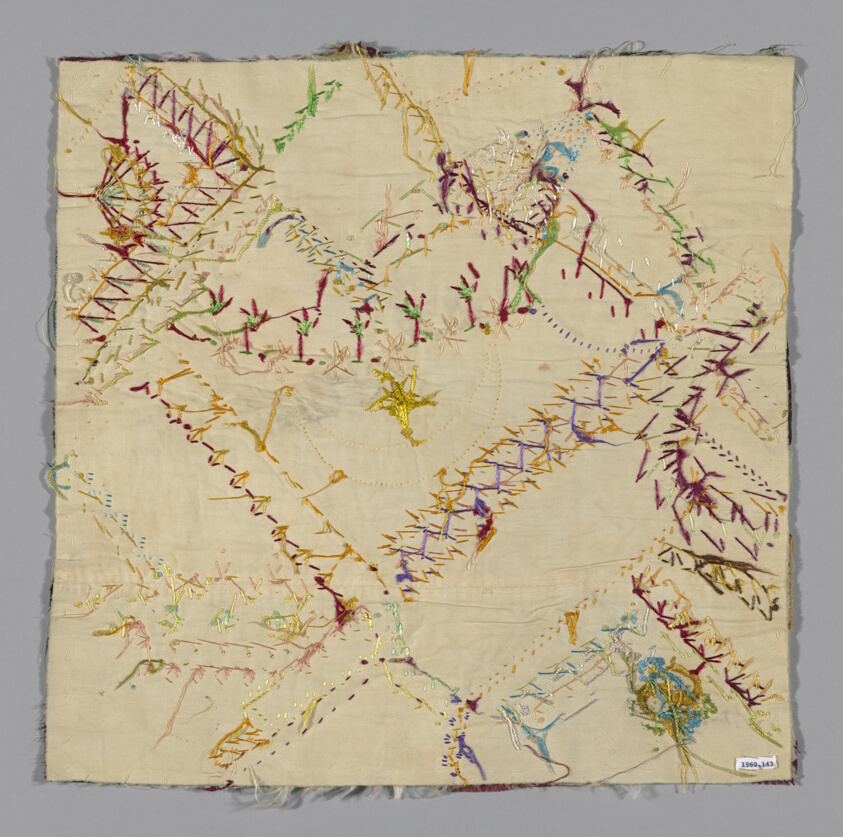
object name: Textile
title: Fragment from Bedcover (Crazy Quilt Block)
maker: United States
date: c. 1884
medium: Silk, tabby, satin, velvet & twill weaves. some have warp-face, extra pattern wefts, printing, or moiré pattern, cisele velvet Embroidered in silk floss & 2 ply twist. (Backed with tabby cotton after piecing.) Embroidery thru 3 layers Stitches: Herrinbone, feather, buttonhole, cross, satin, fishbone knot, & variations with line stitch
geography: United States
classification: needlework - quilt; textile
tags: star, fans, flowers, moon, stripes